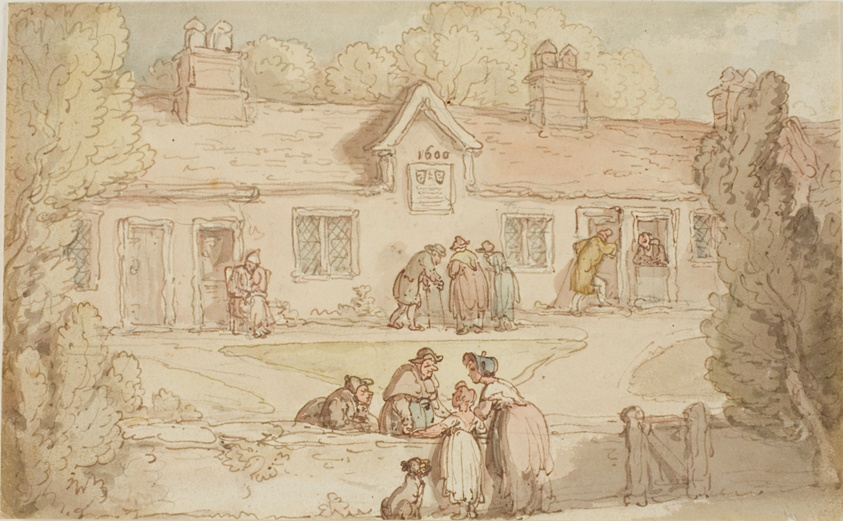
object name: Drawing and Watercolor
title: Alms House of Tottenham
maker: Thomas Rowlandson (English, 1756-1827)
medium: Pen and brown ink with brush and watercolor, over graphite, on cream wove paper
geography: England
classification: watercolor; drawings (visual works); prints and drawing